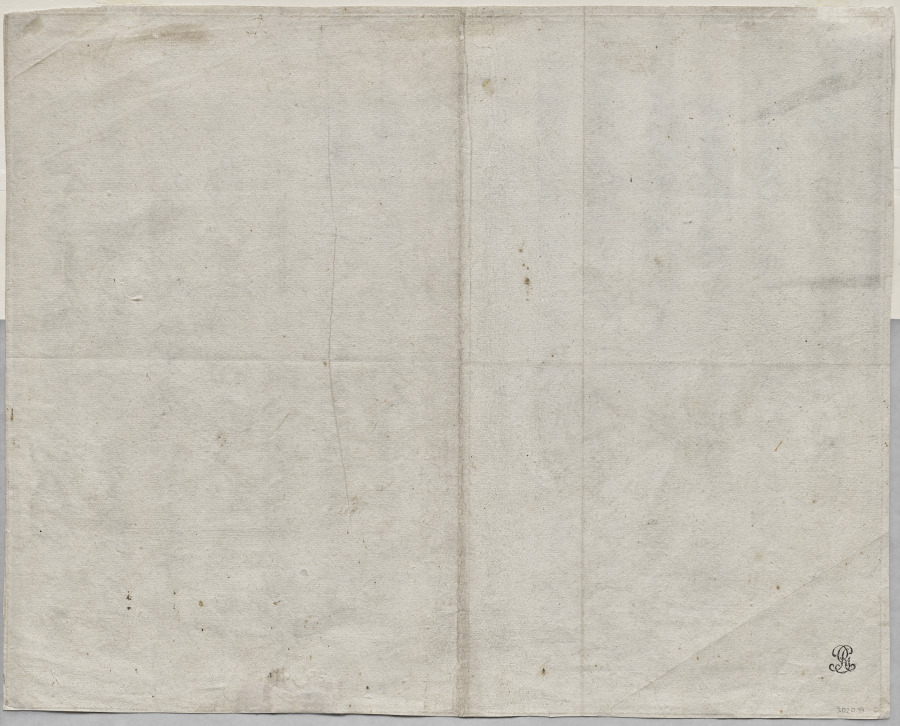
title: Saint Martin with His Horse on a Ship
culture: Netherlands, 16th century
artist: Johannes I van Doetecum (d. 1605)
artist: Lucas van Doetecum (active 1554–1572)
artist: after Hieronymous Bosch (Netherlandish, c. 1450–1516)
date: c. 1561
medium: etching on laid paper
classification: Print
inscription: Bottom right: Iher°nimùs bos inúetor; further right: H. COCK exc.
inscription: Text in legend below, De[n] goede[n] Sínte Marten is hier gestalt: onder al dit grue pel Vuijl arm gespuijs: haer deijlende sijnen mantele inde stede Va[n] gelt: nou Vechte[n]se om de proije dit quaet gedruijs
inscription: First state of three (i/iii)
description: During the 16th century, November 11 brought the feast day of Saint Martin in Northern Europe, accompanied by boisterous parties and drinking “St. Martin’s wine.” This print depicts one such feast gone awry, with the sins of gluttony, greed, and sloth on full display among the crowd of beggars and devils who fight for their chance at the wine, or for no apparent reason. In the center of the scene, Saint Martin stands ready to divide his cloak in order to share it with a beggar, the single act of charity in the scene.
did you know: The artist of this boisterous scene combined a saint’s charitable act with all manner of excessive behaviors that takes place in a contemporary coastal city much like that where the print was made.